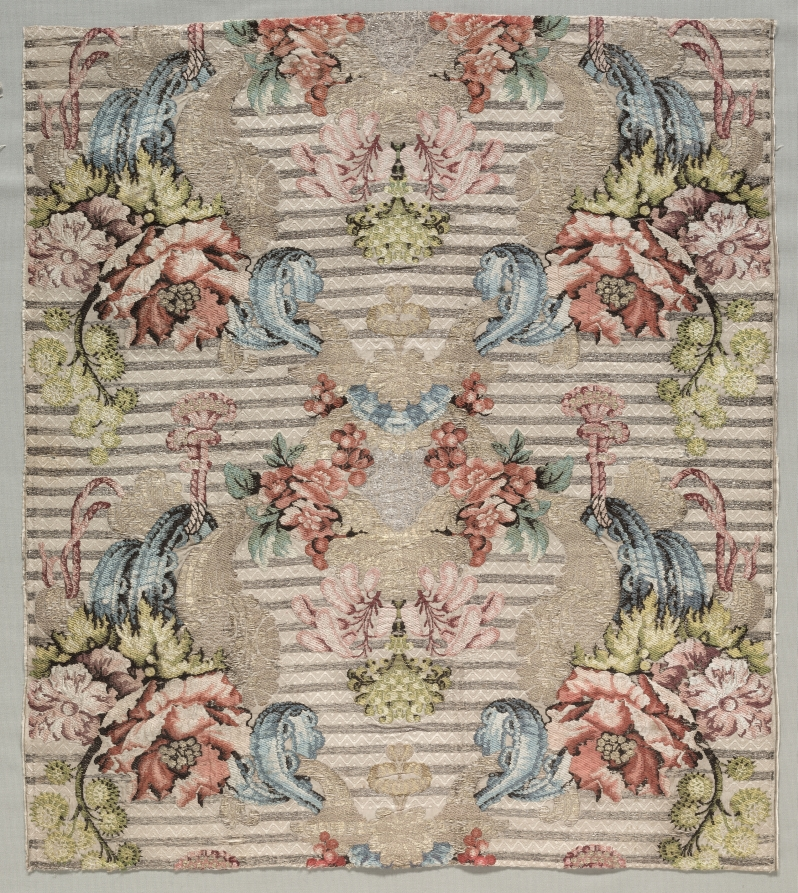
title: Fragment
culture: France, 18th century, Period of Louis XV (1723-1774)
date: 1715–1725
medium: silk, gold and silver filé, silver strips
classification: Textile